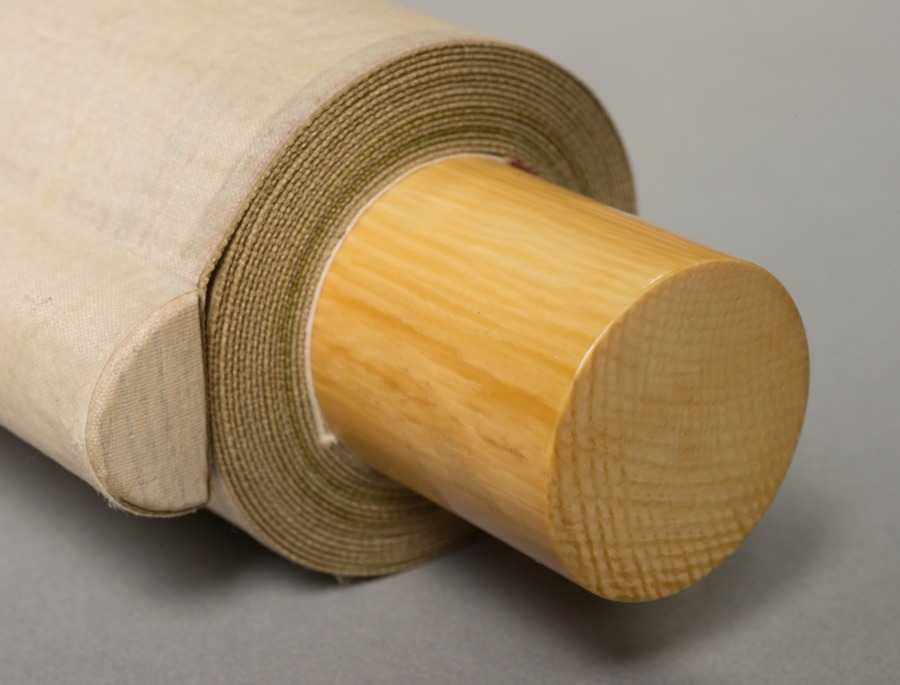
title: Two Beauties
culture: Japan, Edo period (1615–1868)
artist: Kitao Shigemasa (Japanese, 1739–1819)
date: late 1700s–early 1800s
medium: hanging scroll, pillar painting: ink and color on silk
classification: Painting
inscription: Artist's signature and seal, lower right corner. Poem inscribed on upper section of scroll.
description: Shigemasa favored using colors in broad opaque masses, as seen here in the beauties’ robes. He was a painter, printmaker, and poet, specializing in courtesan and actor prints. The format of this hanging scroll or "pillar painting" allows for the work to be hung on a pillar in a Japanese home.